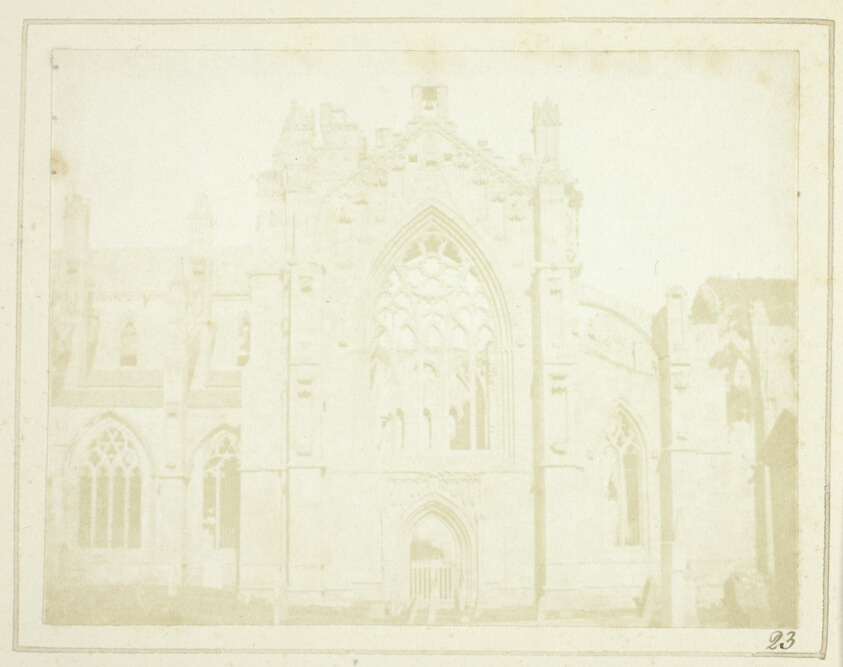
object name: Photograph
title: Melrose Abbey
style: 19th century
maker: William Henry Fox Talbot (English, 1800–1877)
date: 1844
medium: Salted paper print, plate XXIII from the album "Sun Pictures in Scotland" (1845)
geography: England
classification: salted paper print; photographic process; photography; photograph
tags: Collected by Hugh Edwards